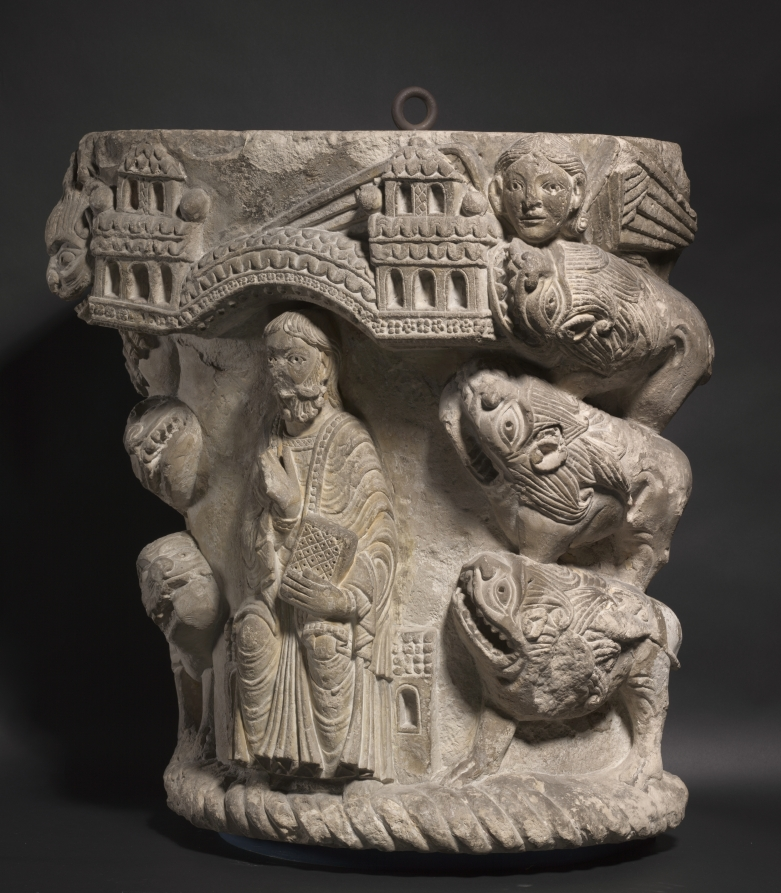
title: Daniel in the Lion's Den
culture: France, Saint-Aignan-sur-Cher, 12th century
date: c. 1125–50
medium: limestone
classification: Sculpture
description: According to the Old Testament, Daniel was cast into a lion’s den as punishment for his belief in a single god, but he was miraculously delivered from harm on account of his faith. This story is related here, with Daniel flanked by lions and the angel sent by God to save him. Together with other decorated capitals, this imposing work of Romanesque sculpture once decorated the interior of the church of Saint-Aignan-sur-Cher, a city in central France.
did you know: During the 12th century, churches used images to teach the faithful who were illiterate. While Daniel lived before Jesus, he is depicted holding a bible, alluding to the continuity between the Old and New Testaments.